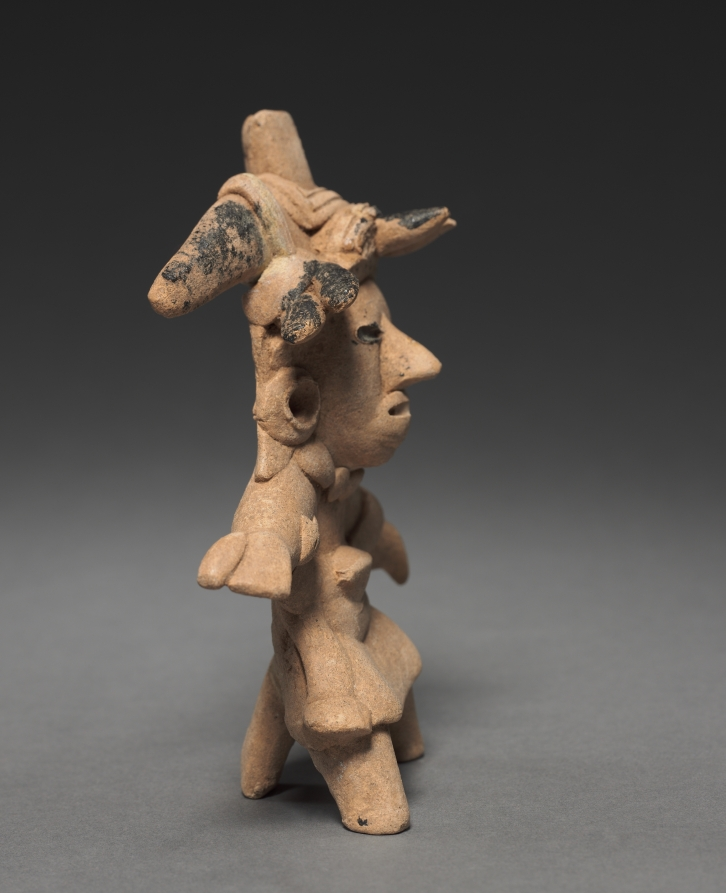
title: Tripod Whistle Figurine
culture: Mexico, Veracruz, Remojadas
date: c. 150–1 BCE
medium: earthenware with asphalt paint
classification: Sculpture